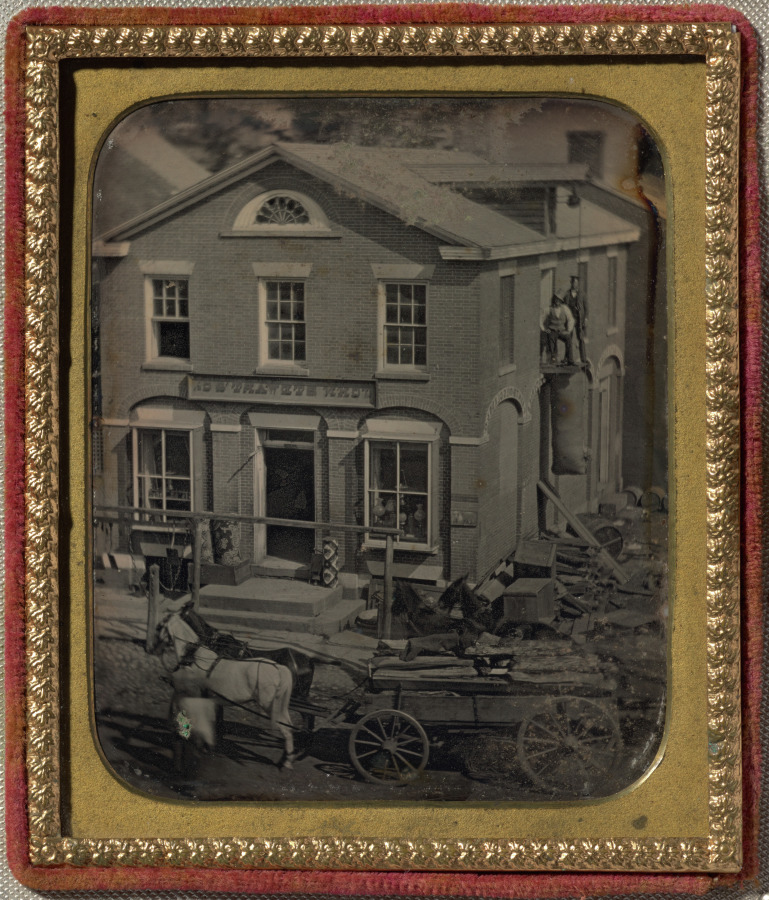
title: Construction of the John Stewart Store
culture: America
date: c. 1856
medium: daguerreotype, sixth plate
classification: Photograph